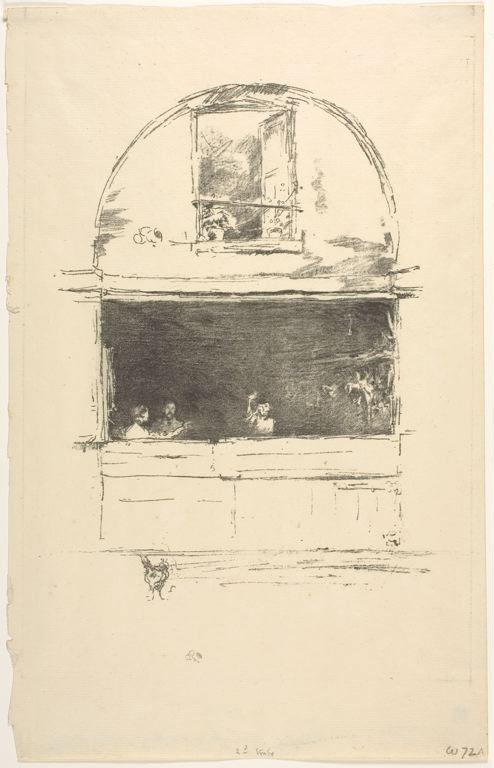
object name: Print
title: The Forge, Passage du Dragon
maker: James McNeill Whistler (American, 1834-1903)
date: 1894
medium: Lithograph on cream laid paper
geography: United States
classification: prints and drawing; lithograph; print; paper